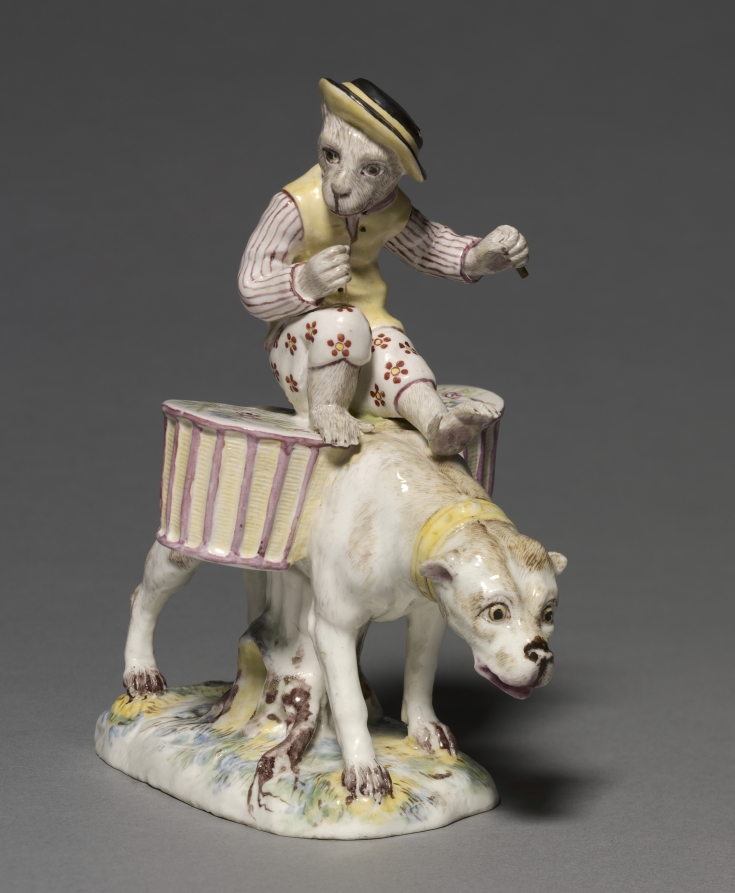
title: Figure of a Monkey on a Dog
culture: France, Mennecy, 18th century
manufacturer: Villeroy Factory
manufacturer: Mennecy- Villeroy Factory (French)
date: c. 1745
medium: soft-paste porcelain with enamel decoration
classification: Ceramic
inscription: [Incised on back of base, filled with manganese (brown)]: D.V.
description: Images of this type, monkeys dressed in human clothing and engaged in human pursuits, were called singeries and were represented in 18th-century French painting and decorative art. This particular figurine was based on a book of engravings that provided designs for contemporary craftsmen and was published by animal painter Christopher Huet in 1748.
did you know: This monkey may have once held a stick in its outstretched left hand.